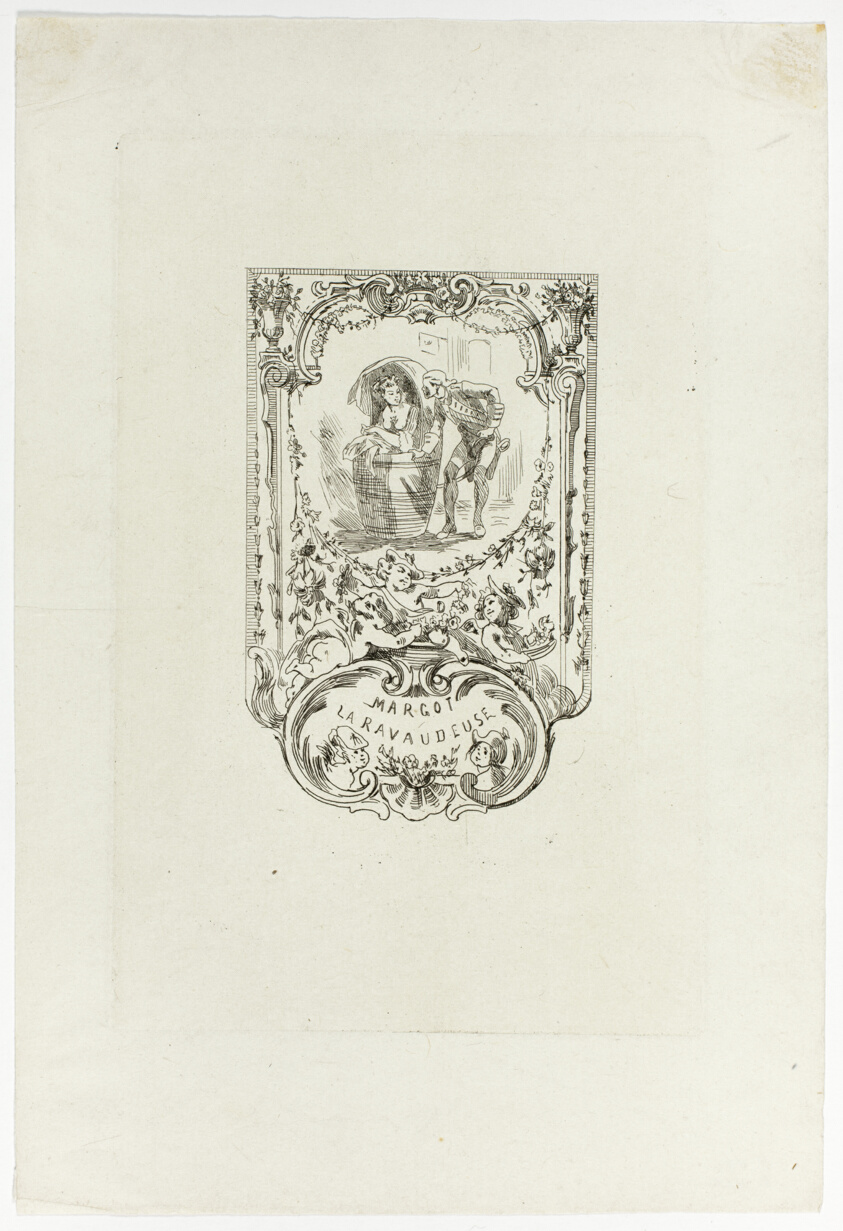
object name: Print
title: Frontispiece to Margot, la ravaudeuse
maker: Félicien Rops (Belgian, 1833-1898)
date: 1868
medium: Etching on grayish ivory laid chine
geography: Belgium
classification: etching; print; prints and drawing